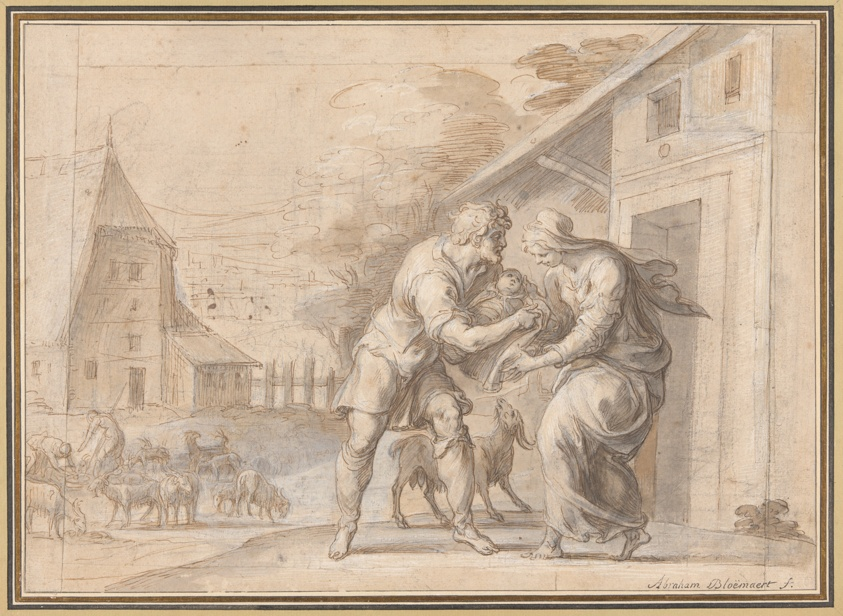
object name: Drawing and Watercolor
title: The Goatherd Lamon Handing the Infant Daphnis to His Wife Myrtele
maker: Ambroise Dubois (French, 1543-1614)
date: after 1606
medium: Pen and brown ink and brush and brown ink wash, with black chalk, brush and gray wash, and opaque white watercolor, on pieced cream laid paper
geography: France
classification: pen and ink drawings; drawings (visual works); prints and drawing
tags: mythology